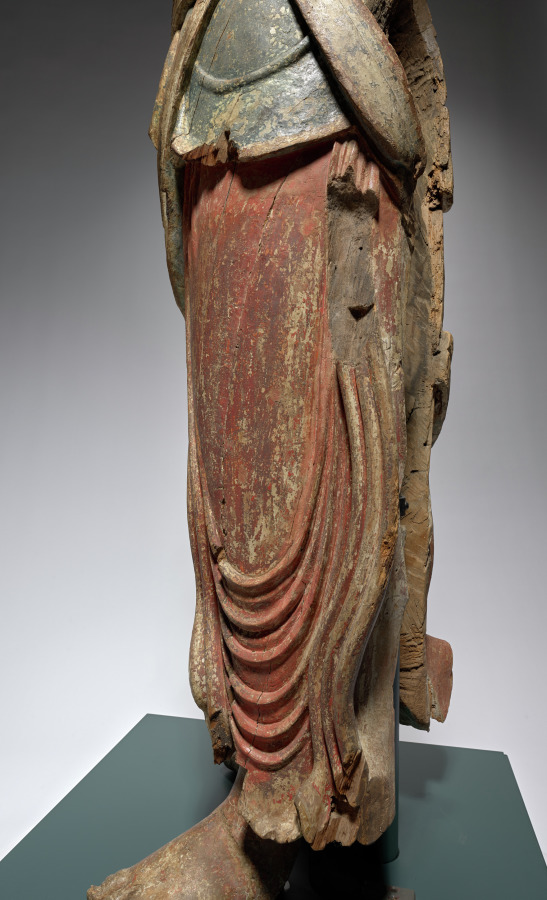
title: Eleven-Headed Guanyin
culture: China, late Northern Song dynasty (960-1127) - Jin dynasty (1115-1234)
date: 1100–1200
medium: wood with polychromy and cut gold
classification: Sculpture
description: The bodhisattva is an enlightened being dedicated to the spiritual awakening of all beings. The compassionate bodhisattva Guanyin, in a variety of manifestations, is probably the most popular deity of worship in Chinese Buddhism. In the Esoteric Buddhist form shown here, this standing Guanyin has a total of eleven heads, with smaller ones above the principal head. The uppermost head represents the Buddha Amitabha, to whom he is closely related. The eleven heads symbolize the Buddha’s steps on the path to enlightenment.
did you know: This Guanyin is carved from a single block of willow (genus Salix sp.).